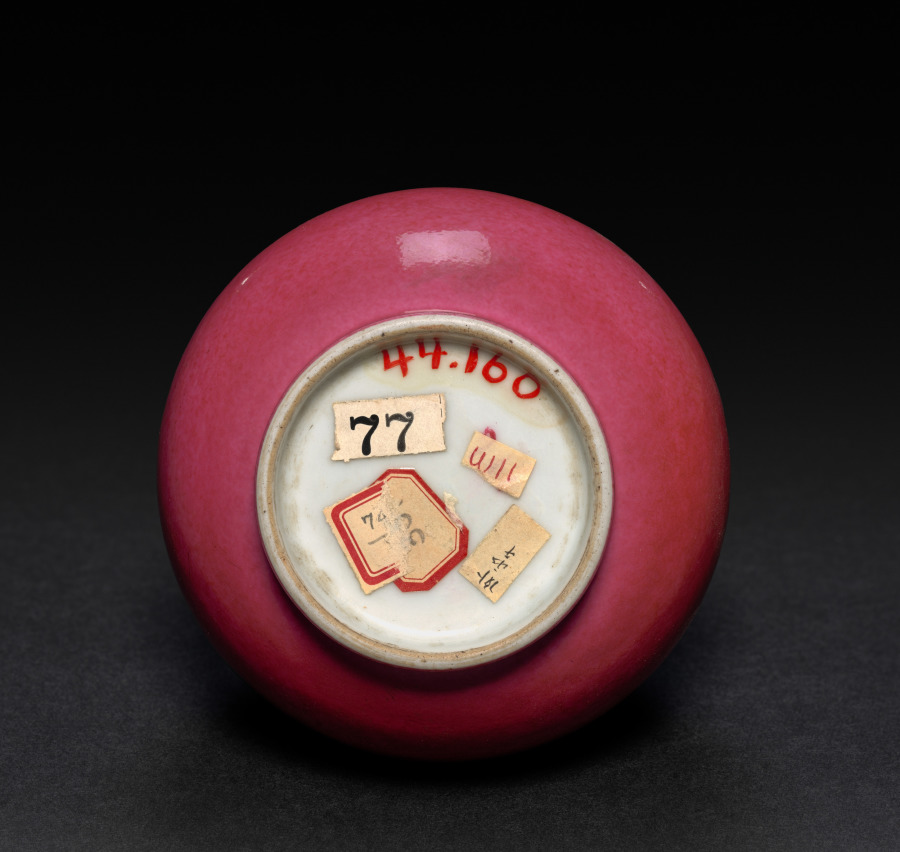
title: Vase with Pear-Shaped Body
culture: China, Qing dynasty (1644-1911)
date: 1644–1911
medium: porcelain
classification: Ceramic